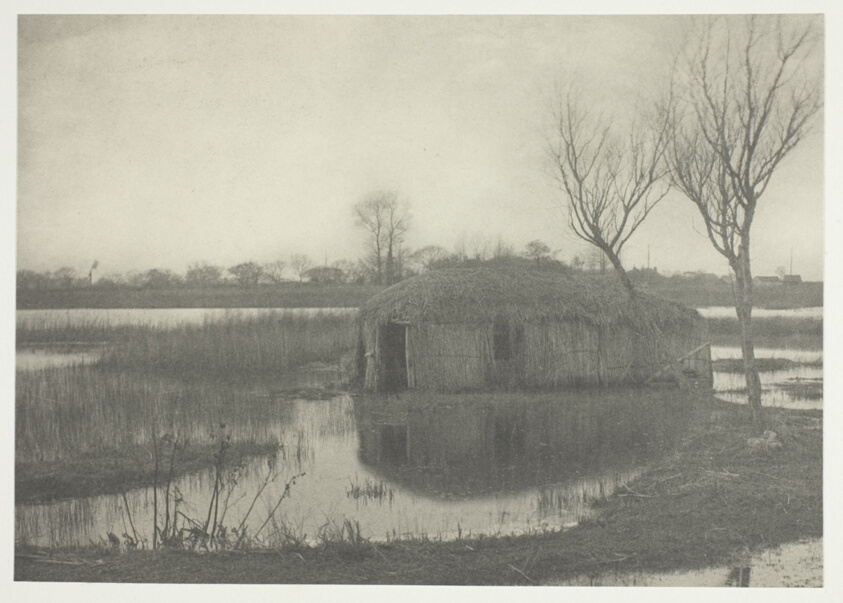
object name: Photograph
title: A Reed Boat-House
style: 19th century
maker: Peter Henry Emerson (English, born Cuba, 1856–1936)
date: 1886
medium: Platinum print, pl. XXXI from the album "Life and Landscape on the Norfolk Broads" (1886)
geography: England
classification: platinum print; photographic process; photography; photograph